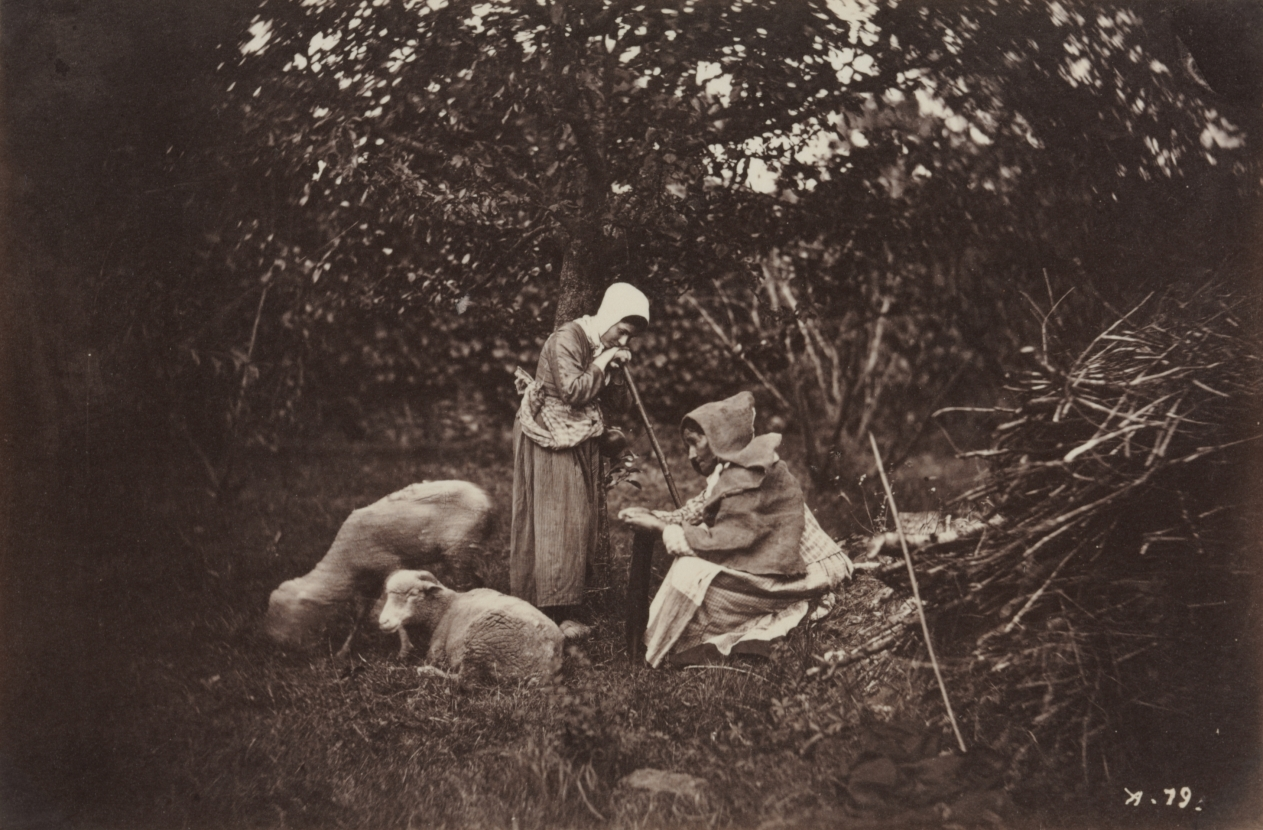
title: Two Shepherdesses Resting with Two Sheep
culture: France, 19th century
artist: Auguste Giraudon's Artist (French)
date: late 1870s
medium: albumen print from wet collodion negative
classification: Photograph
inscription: printed on lower right of image: "A.79"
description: Auguste Giraudon was an important Parisian publisher of photographs. During the 1870s, he commissioned one or more artists—probably a French painter who wished to remain anonymous—to create photographs of peasants. Now called Giraudon’s Artist, this photographer was one of the few in the 1800s specializing in rural figure studies created for use by artists. The images were likely taken near Barbizon, a destination popular with artists who wanted to work from nature. The artistry of these images derives from their skillful use of light, ability to render a subject in the landscape, and a perceptive depiction of human dignity.